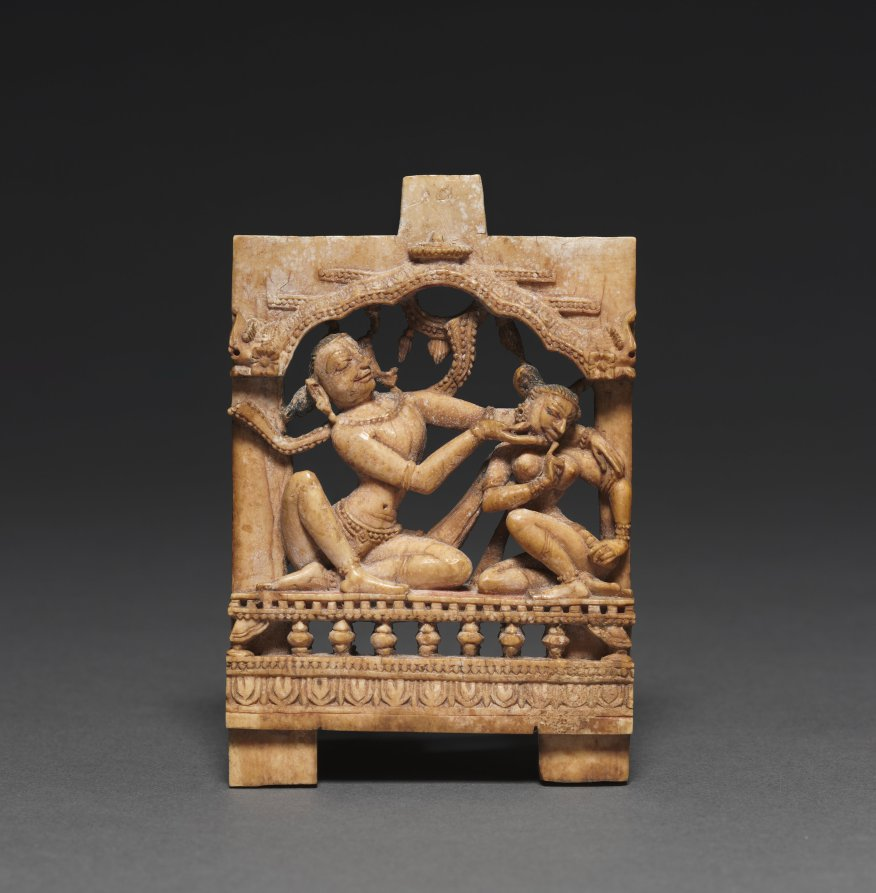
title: Mithuna (Loving Couple)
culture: India, Orissa, early 14th Century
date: c. 1300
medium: ivory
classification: Ivory